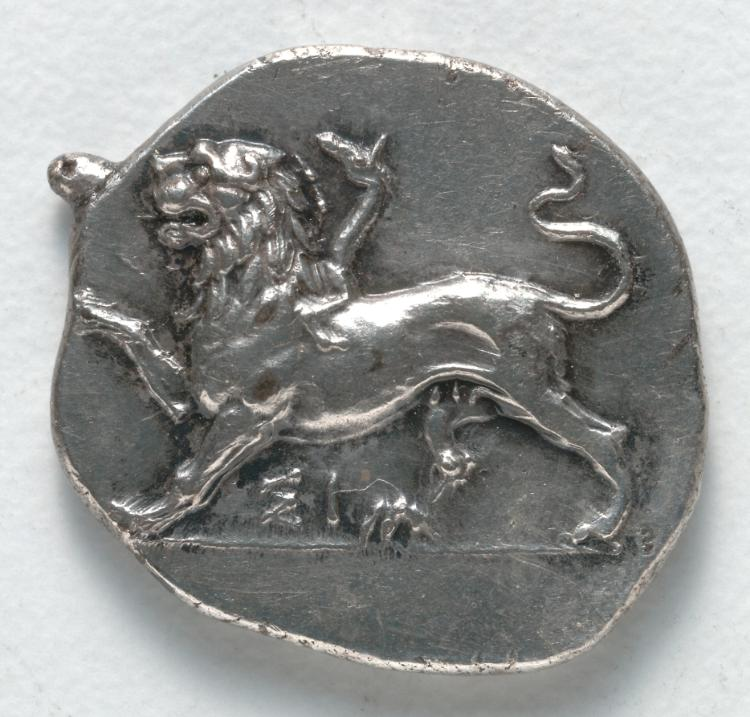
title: Hemidrachm: Chimaera (obverse)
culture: Greek, minted at Sikyon (Peloponnesos)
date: 400–323 BCE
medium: silver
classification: Coins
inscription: ΣΙ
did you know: The monstrous chimaera adds a goat head and snake-headed tail to the already fearsome lion.